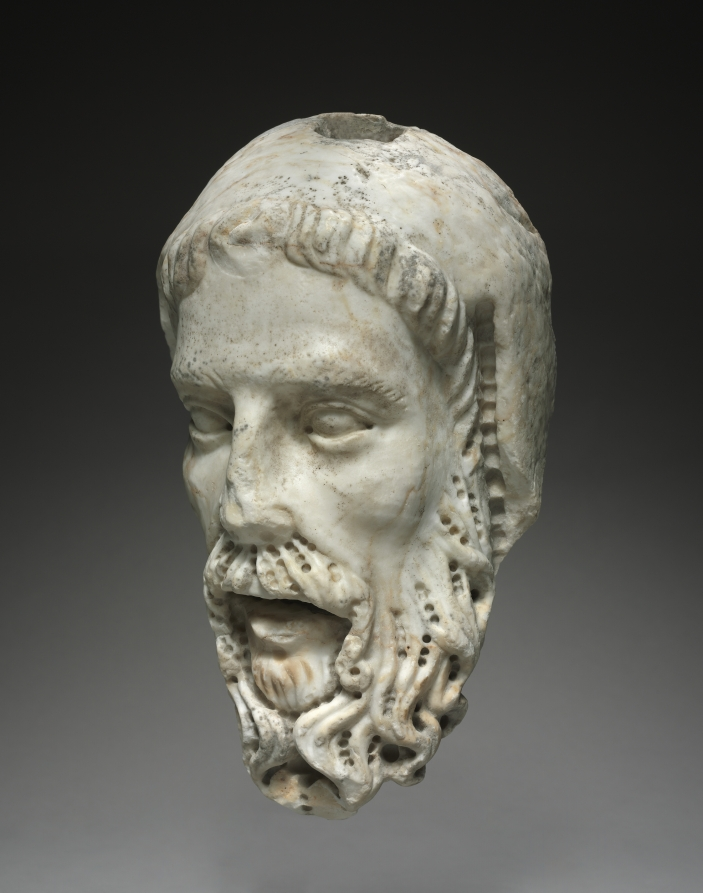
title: Head of a Prophet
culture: Italy, Siena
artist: workshop of Giovanni Pisano (Italian, c. 1240-c. 1320)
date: c. 1300–1325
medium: marble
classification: Sculpture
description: This head exhibits many of the characteristics of the style associated with the workshop of Giovanni Pisano. These are particularly noteworthy in the sensitive carving of the haunting face and its strikingly drilled beard. The head compares favorably to the sculpture made while Giovanni was master of works at Siena Cathedral (1285-97). Recent research suggests that it may once have belonged to a full-length Old Testament prophet looming on the exterior of Siena Cathedral.